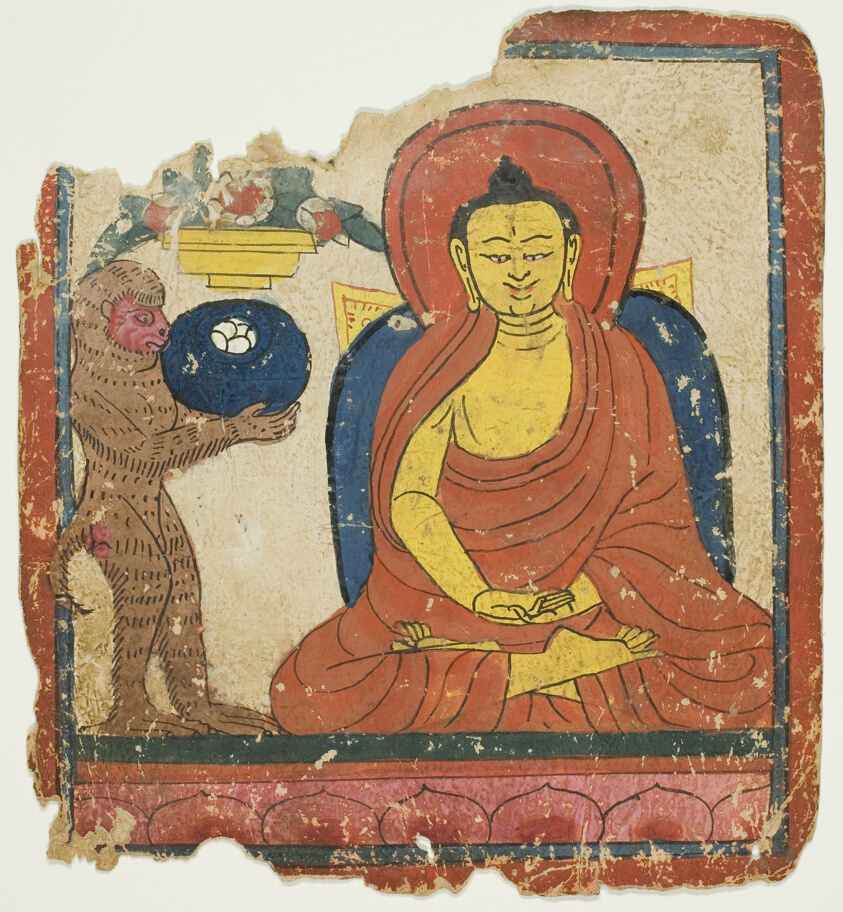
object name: Religious/Ritual Object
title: Image from a Set of Initiation Cards (Tsakali)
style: Himalayan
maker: Southern Tibet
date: 14th/15th century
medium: Ink and watercolor on paper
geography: Tibet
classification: ink; ritual objects